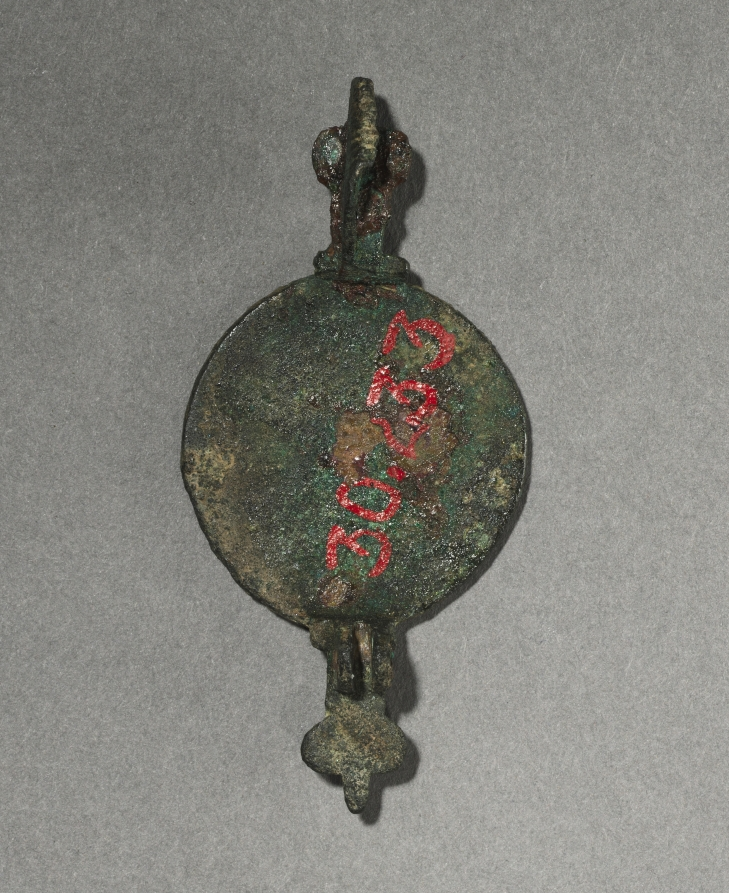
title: Ornamental Brooch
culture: Gallo-Roman or Romano-British, Migration period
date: c. 100–300 CE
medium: bronze and champlevé enamel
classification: Jewelry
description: These brooches functioned as garment clasps (much like the generally larger fibulae) and are distinctive for their decorative enamels. The art of enameling was highly popular among the conquered peoples who lived on the outskirts of the Roman empire, chiefly the Celts and the Gauls. Though the enameling technique was practiced by the Romans themselves on small objects, the brightly colored decoration readily appealed to "barbarian" taste. By the AD 200s, enameled brooches like these were being made in abundance by the native peoples of Britain and Gaul (modern France and Belgium).